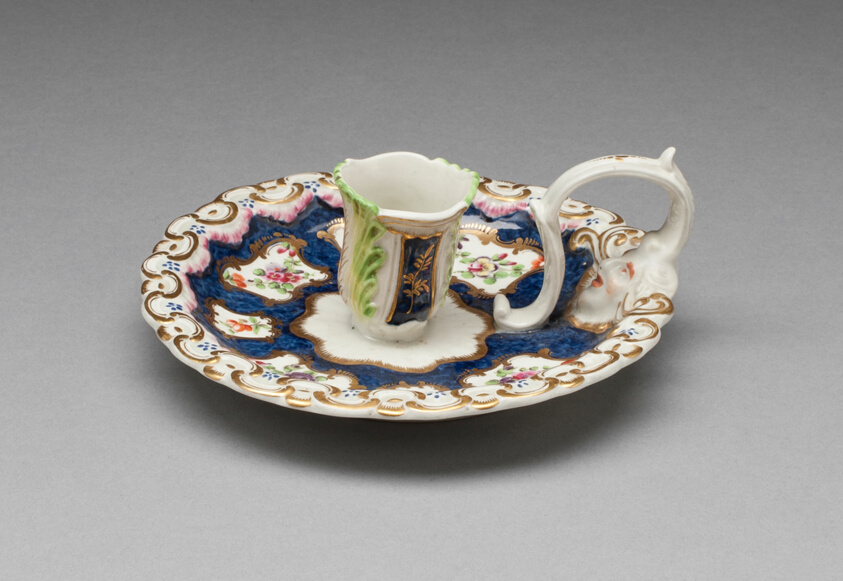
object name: Ceramics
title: Candlestick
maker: Worcester Porcelain Factory (Warmstry House Period, 1751–1783); Worcester, England, founded 1751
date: c. 1770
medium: Soft-paste porcelain with underglaze blue and gilding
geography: Worcester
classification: candleholder - candlestick; candleholder; porcelain; european decorative arts; ceramics